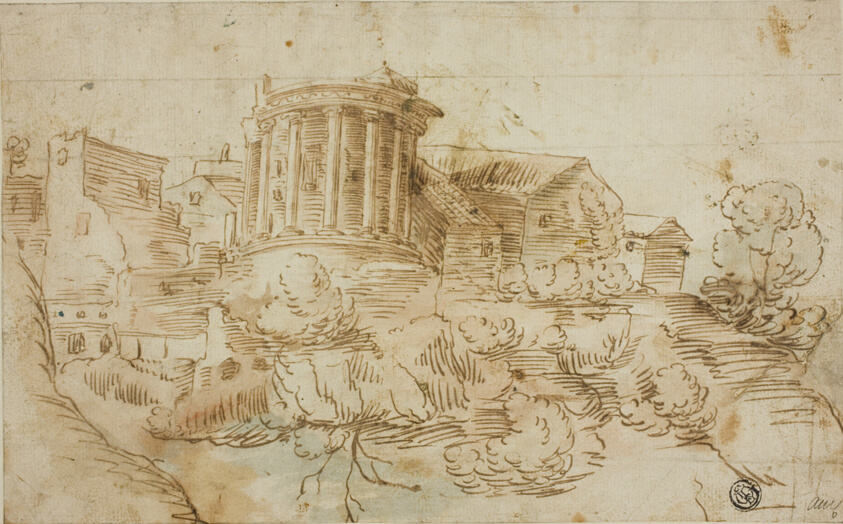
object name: Drawing and Watercolor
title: View of Temple of Vesta, Tivoli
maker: after Giovanni Francesco Grimaldi; Italian, 1606-1680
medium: Pen and brown ink, with brush and brown and blue wash, on ivory laid paper, laid down on ivory laid card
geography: Italy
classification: pen and ink drawings; drawings (visual works); prints and drawing